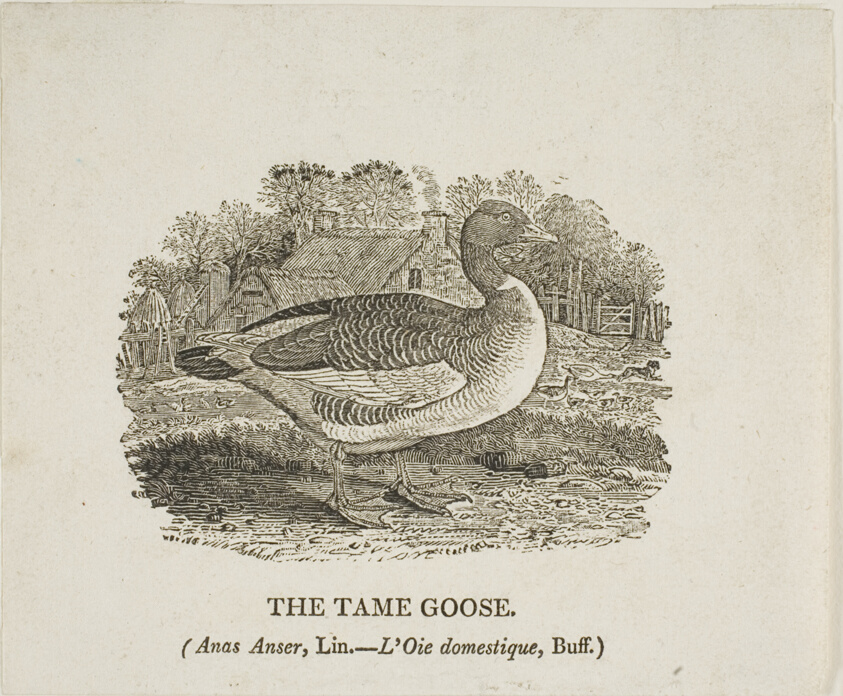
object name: Print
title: Tame Goose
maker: Thomas Bewick (English, 1753-1828)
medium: Woodcut on ivory wove paper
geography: England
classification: relief etching; print; prints and drawing